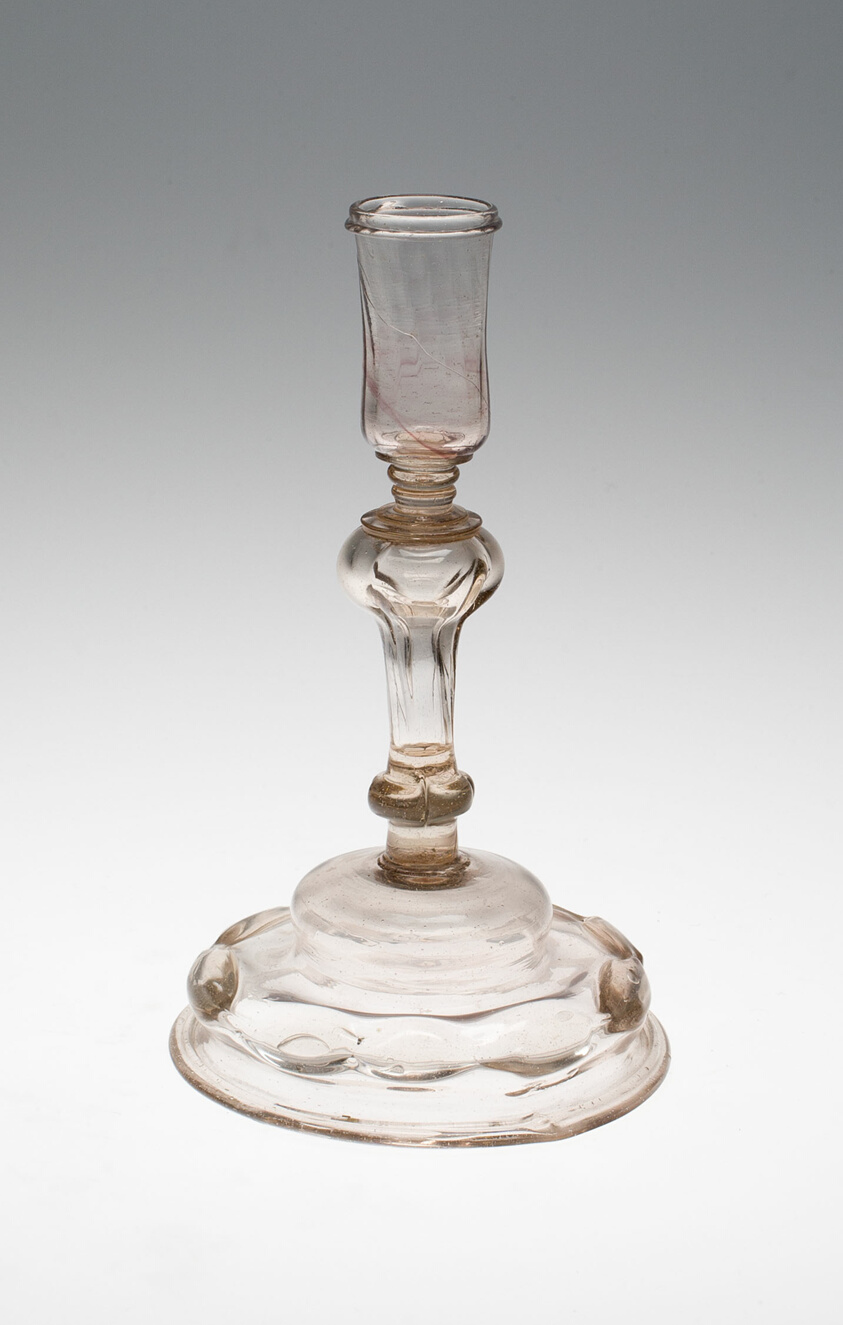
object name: Glass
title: Candlestick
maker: France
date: 1700/50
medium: Glass; blown and molded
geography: France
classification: candleholder - candlestick; candleholder; glass; european decorative arts